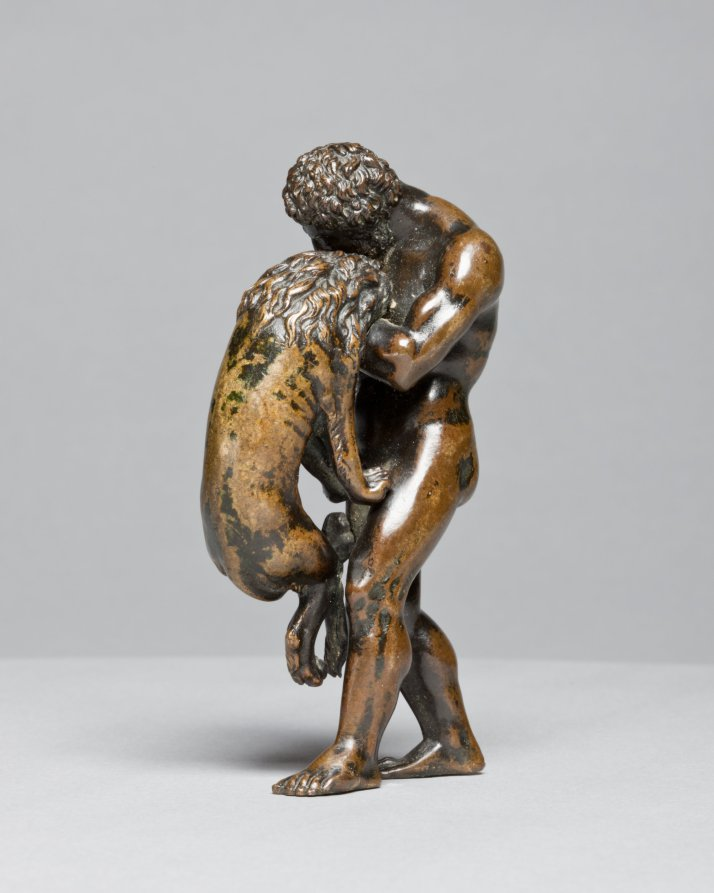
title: Hercules and the Nemean Lion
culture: Italy or France, 16th century or later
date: 1500s or later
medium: bronze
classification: Sculpture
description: The original owner of this work would have understood that this scene referred to the entire story of Hercules, the demi-god who had to accomplish twelve labors. The lion is named after the city of Nemea, near Corinth, a monstrous beast sent by the goddess Hera to wreak havoc on the area. After killing the lion, Hercules wore his pelt, commonly seen in other representations of the hero.